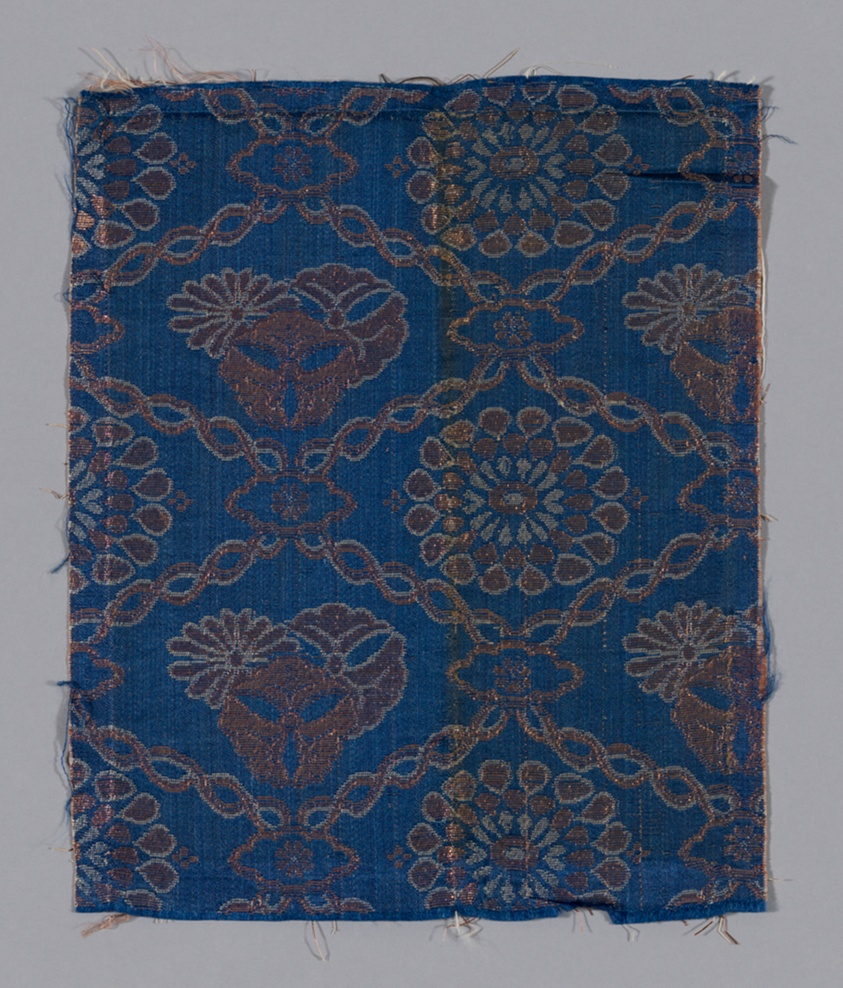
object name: Textile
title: Fragment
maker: Japan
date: 18th century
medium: Fancy compound satin, silk and gilt paper; 2 strips to m.m.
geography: Japan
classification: textile; weaving